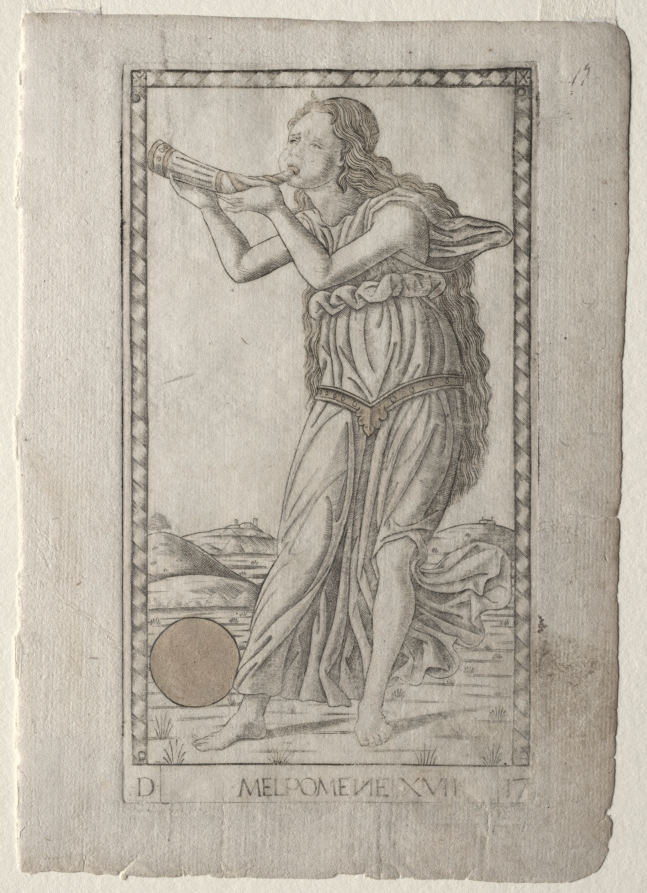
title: Melpomene (tragedy) (from the Tarocchi series D: Apollo and the Muses, #17)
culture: Italy, Ferrara, 15th century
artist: Master of the E-Series Tarocchi (Italian, active 1460s)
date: before 1467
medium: engraving hand-colored with gold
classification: Print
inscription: Lettered below the image of Melpomene: ·D· / ·MELPOMENE XVII· / ·17·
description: This engraving is part of the Tarocchi group marked with the letter “D,” and named Apollo and the Muses. In Greek mythology, the nine Muses (Calliope, Urania, Terpsichore, Erato, Polyhymnia, Thalia, Melpomene, Euterpe, and Clio) were the daughters of Zeus, king of the gods, and Mnemosyne, the Titaness of memory. The Muses were goddesses presiding over different branches of the arts and sciences. Their leader and supervisor was Apollo, the god of light, music, prophecy, and poetry. Here, Melpomene is personified as a full-length female figure, turned to left, and set in an imaginary hilly landscape. She is blowing a horn. Melpomene was regarded as the Muse of tragedy.